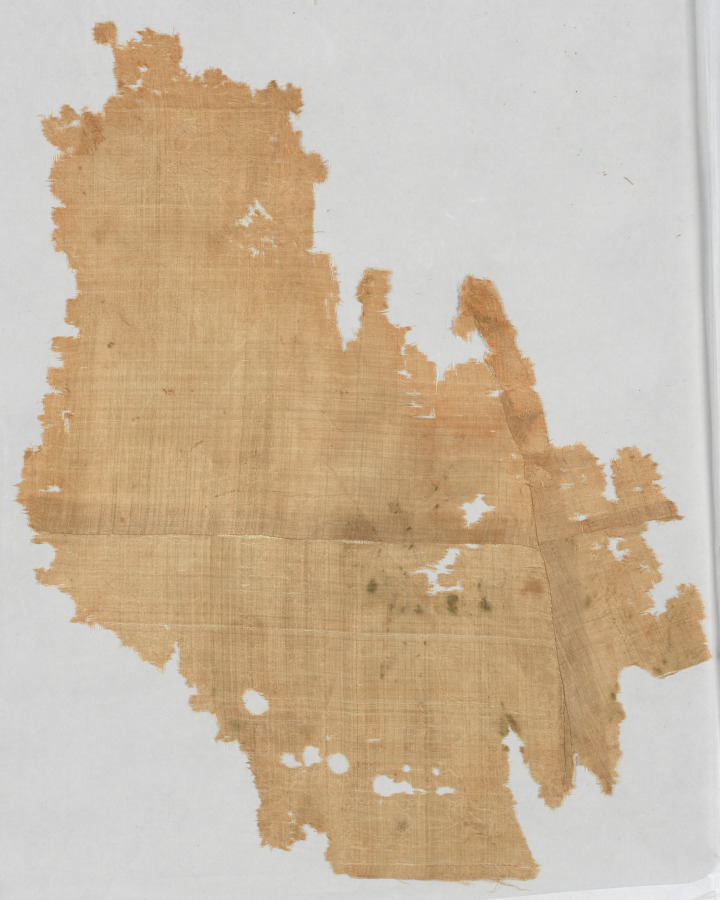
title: Fragment from a Garment (smaller fragment, lining)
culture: China, Liao dynasty (907-1125), 10th century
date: 900s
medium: silk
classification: Textile